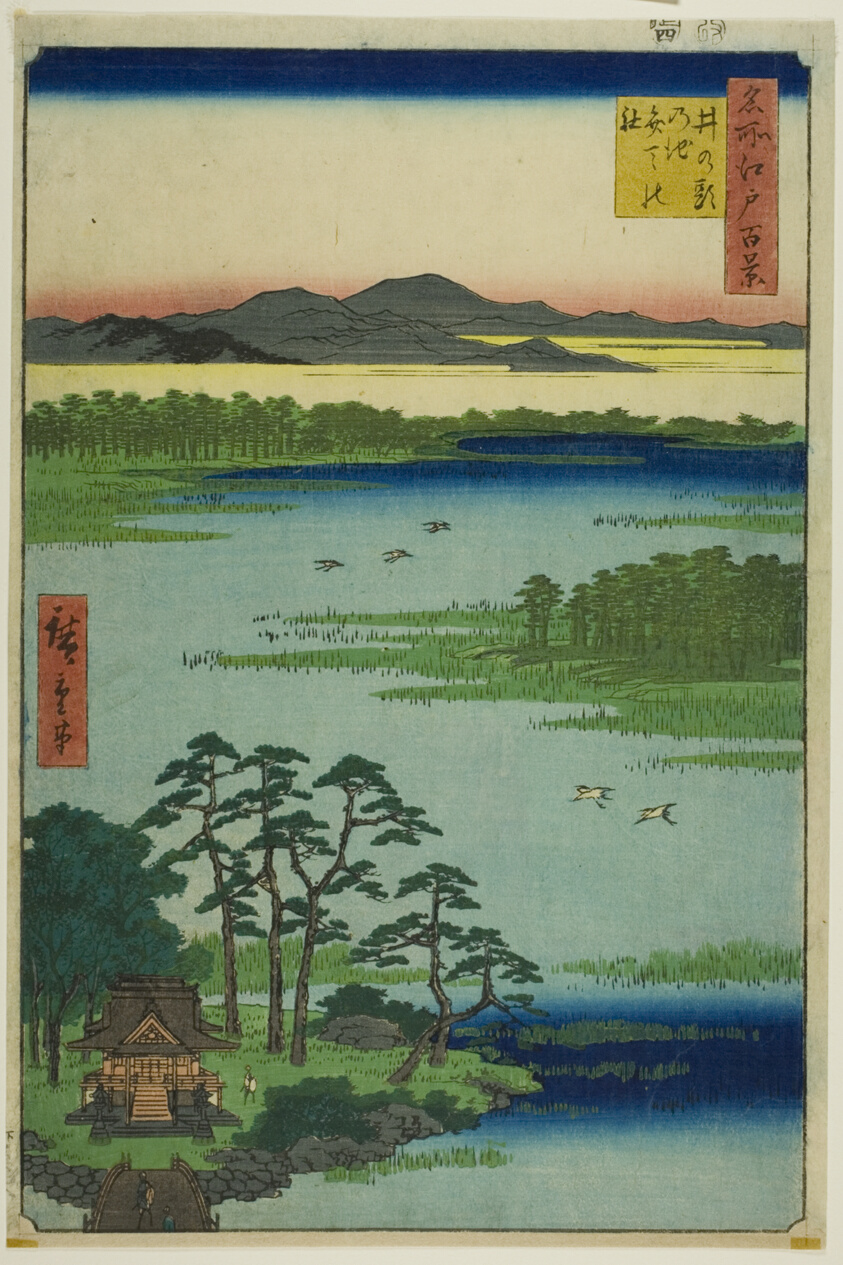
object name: Print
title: Benten Shrine and Inokashira Pond (Inokashira no ike Benten no yashiro), from the series "One Hundred Famous Views of Edo (Meisho Edo hyakkei)"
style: Japanese (culture or style)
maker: Utagawa Hiroshige 歌川 広重; Japanese, 1797–1858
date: 1856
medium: Color woodblock print; oban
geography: Japan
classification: woodblock print; print